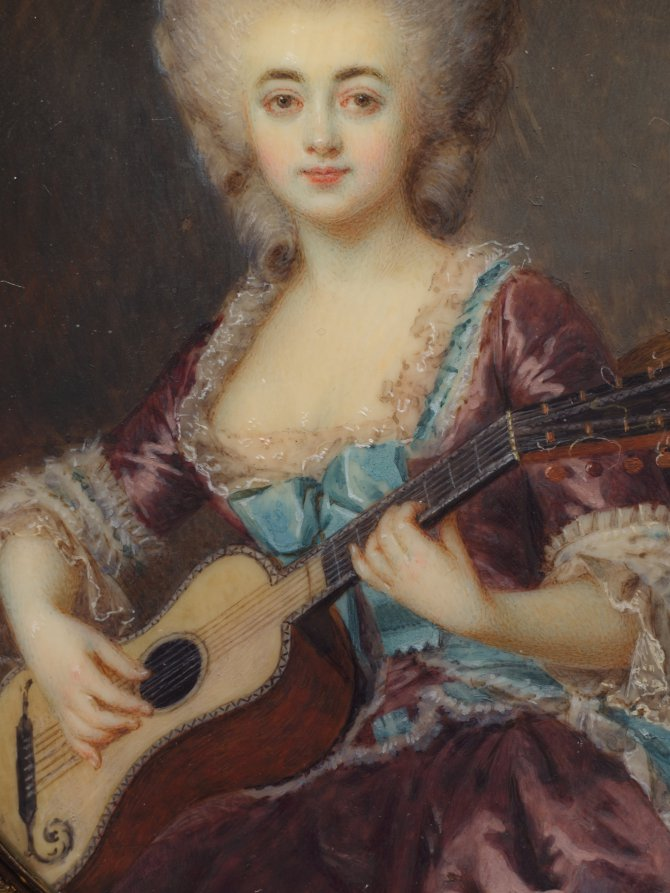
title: Portrait of a Woman with a Guitar, called Louise D'Aumont, Mazarin, Duchesse d'Aumont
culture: France, 18th century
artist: Antoine Vestier (French, 1740–1824)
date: late 18th century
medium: watercolor on ivory in gold mount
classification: Portrait Miniature